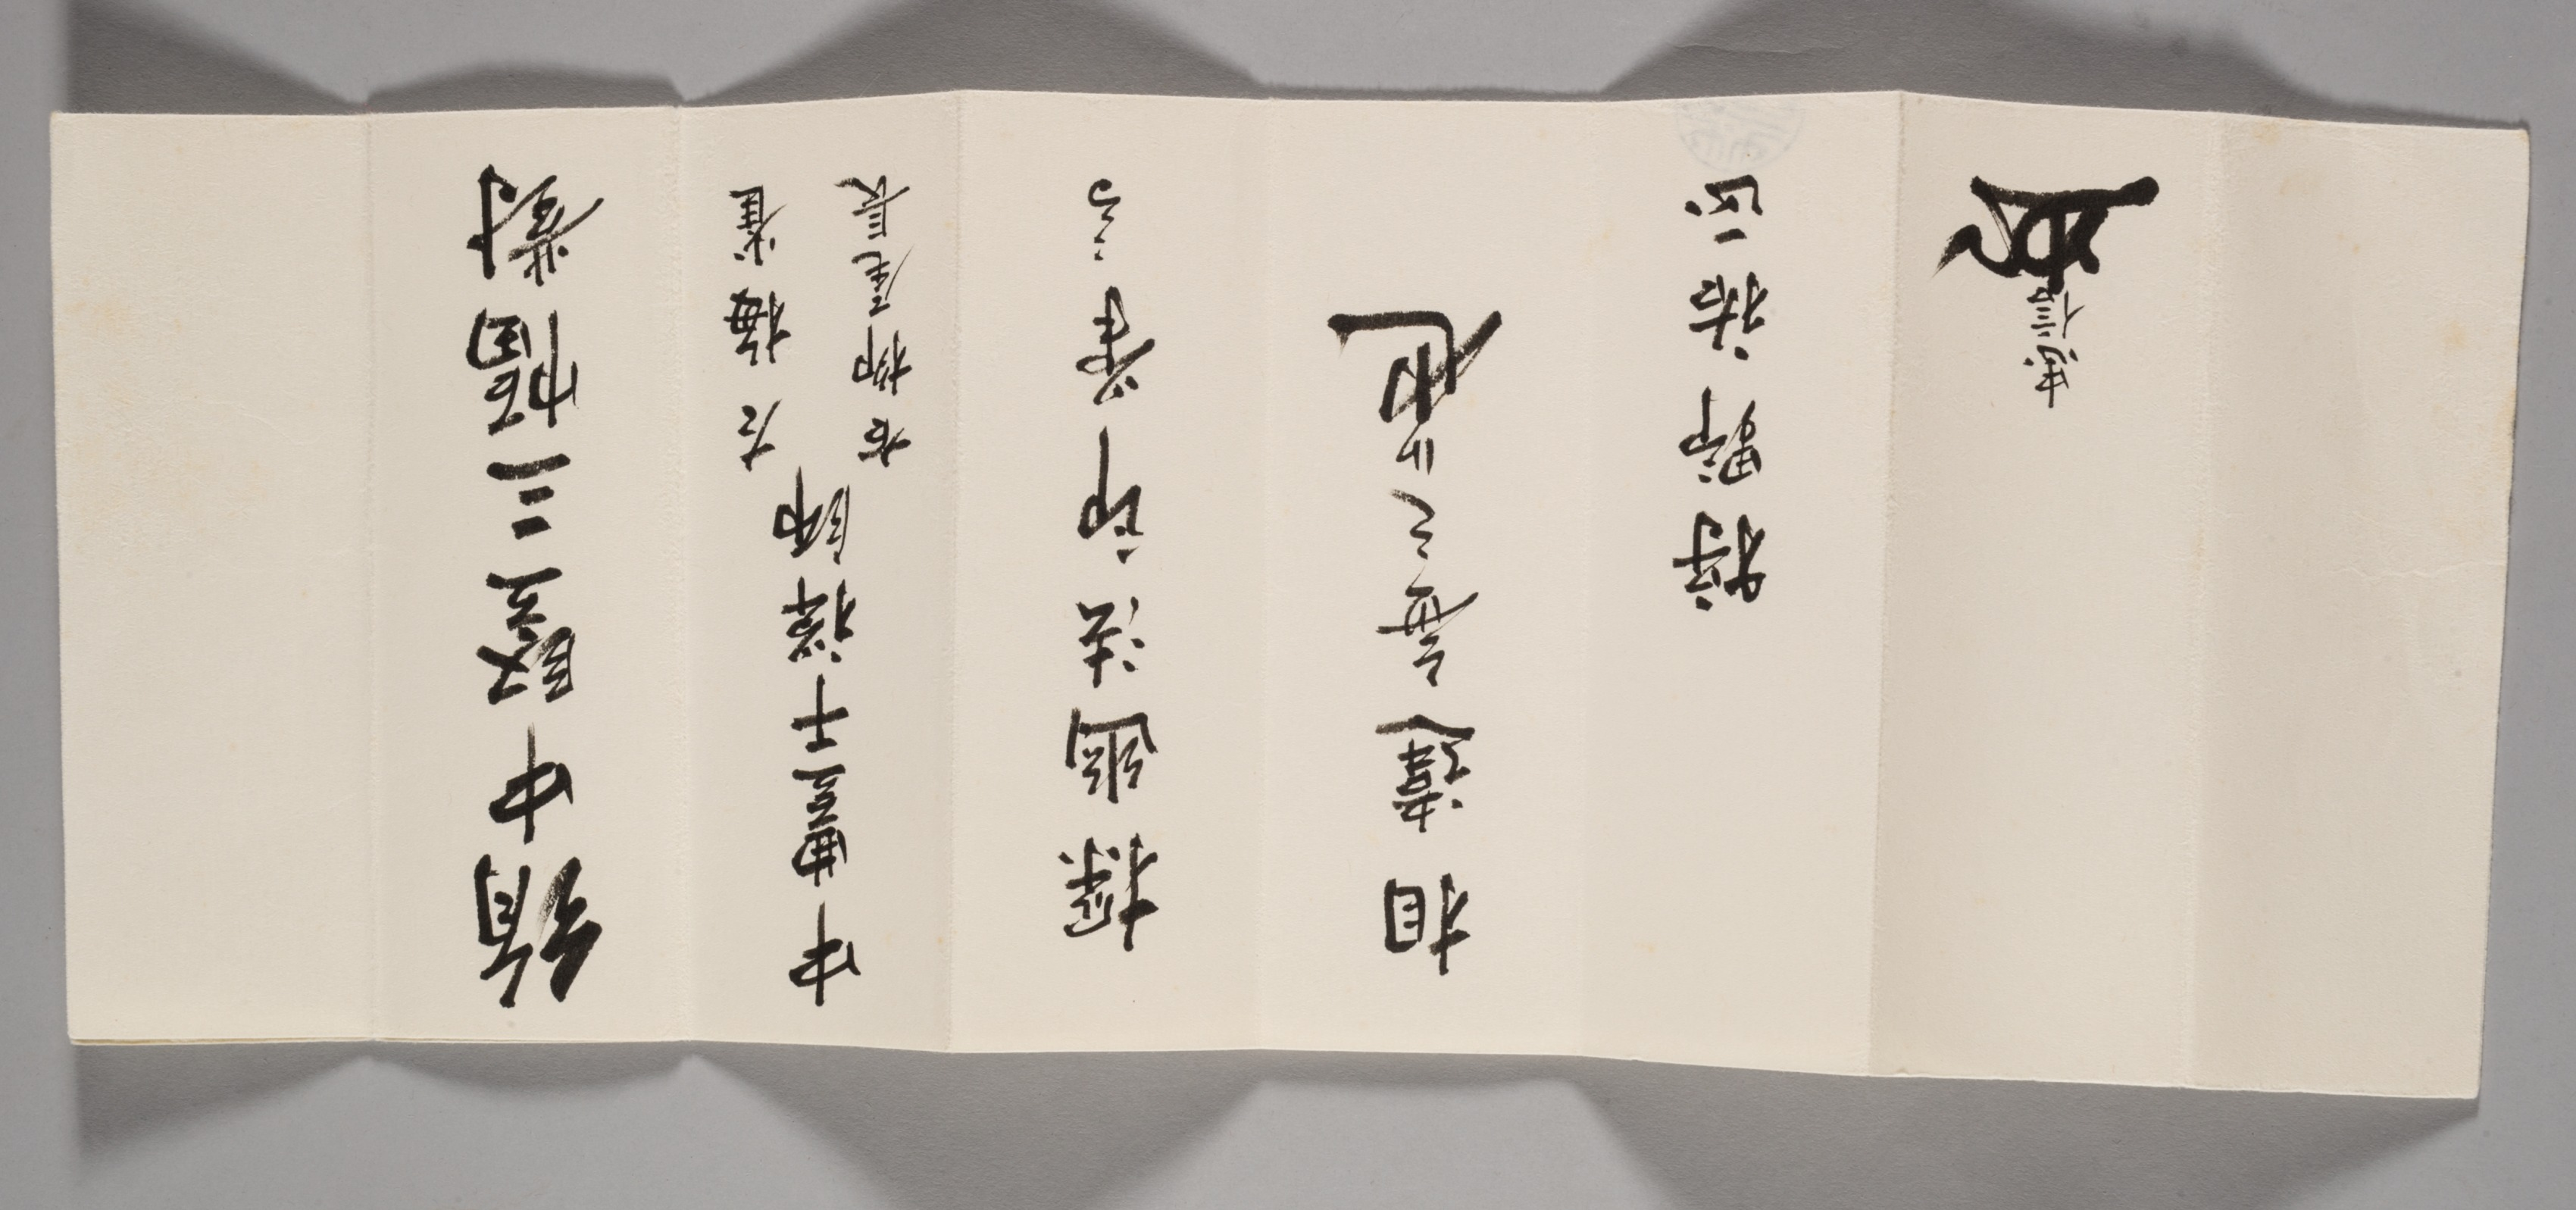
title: Sparrows on Blossoming Plum; A Sage with Tiger; Chinese Bird on Snow-Laden Branch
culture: Japan, Edo period (1615–1868)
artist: Kano Tan’yū (Japanese, 1602–1674)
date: 1661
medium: Triptych of hanging scrolls; ink and slight color on silk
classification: Painting